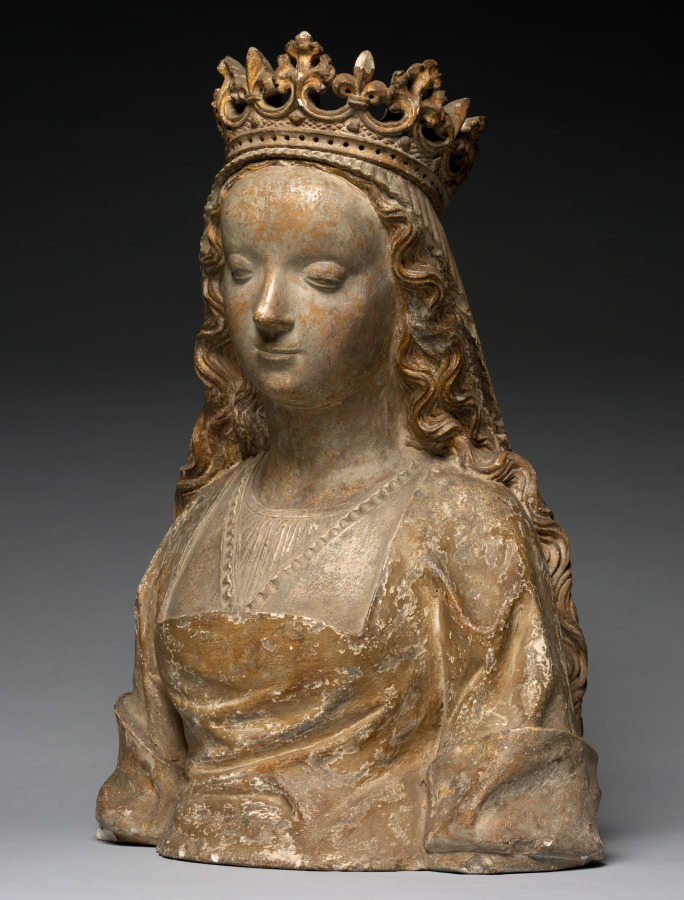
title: Bust called Anne de Bretagne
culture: France, 16th century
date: c. 1500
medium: stone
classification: Sculpture